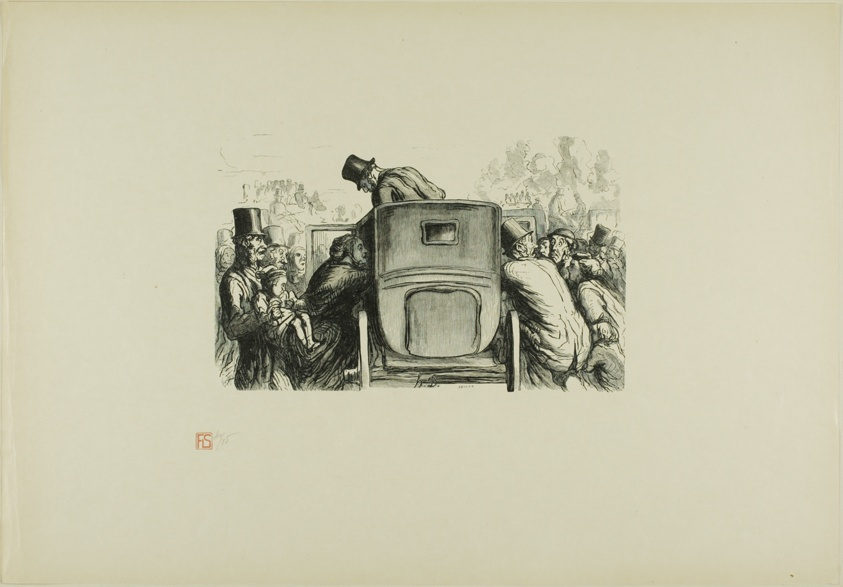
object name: Print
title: At the Universal Exhibition: The visitor will easily find any means of transportation to return to his hotel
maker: Julien Antoine Peulot (French, born 1827); after Honoré Victorin Daumier (French, 1808-1879); printed by François Louis Schmied (Swiss, 1873-1941); published by Jules Meynial (French, 20th century)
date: 1867, printed 1920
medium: Wood engraving on cream Japanese paper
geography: France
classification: wood engraving; print; prints and drawing